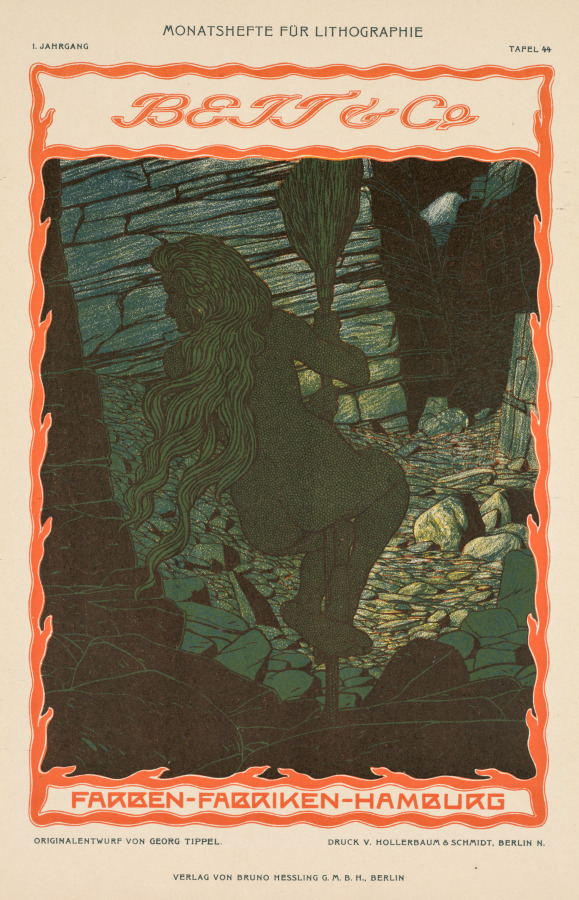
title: Nude Woman on a Broomstick (from Advertisement Series for Coloured Fabric, Beit & Co., Hamburg)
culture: Germany, 19th-20th century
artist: Georg Tippel (German, 1875–1915)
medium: color lithograph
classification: Print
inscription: In plate, above image (L to R): 1. Jahrgang, Monatshefte Fur Lithographie, Tafel 44; in plate, below image (L to R): Originalentwurf von Georg Tippel, Druck V. Hollerbaum & Schmidt, Berlin N.; on bottom edge: Verlag von bruno hessling G.M.B.H., Berlin